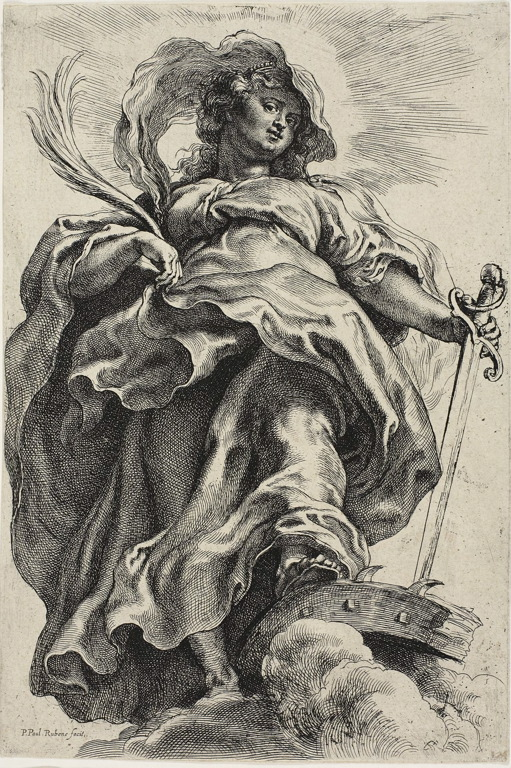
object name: Print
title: Saint Catherine of Alexandria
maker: Peter Paul Rubens (Flemish, 1577-1640)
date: 1620/21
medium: Etching on paper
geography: Flanders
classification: etching; print; prints and drawing